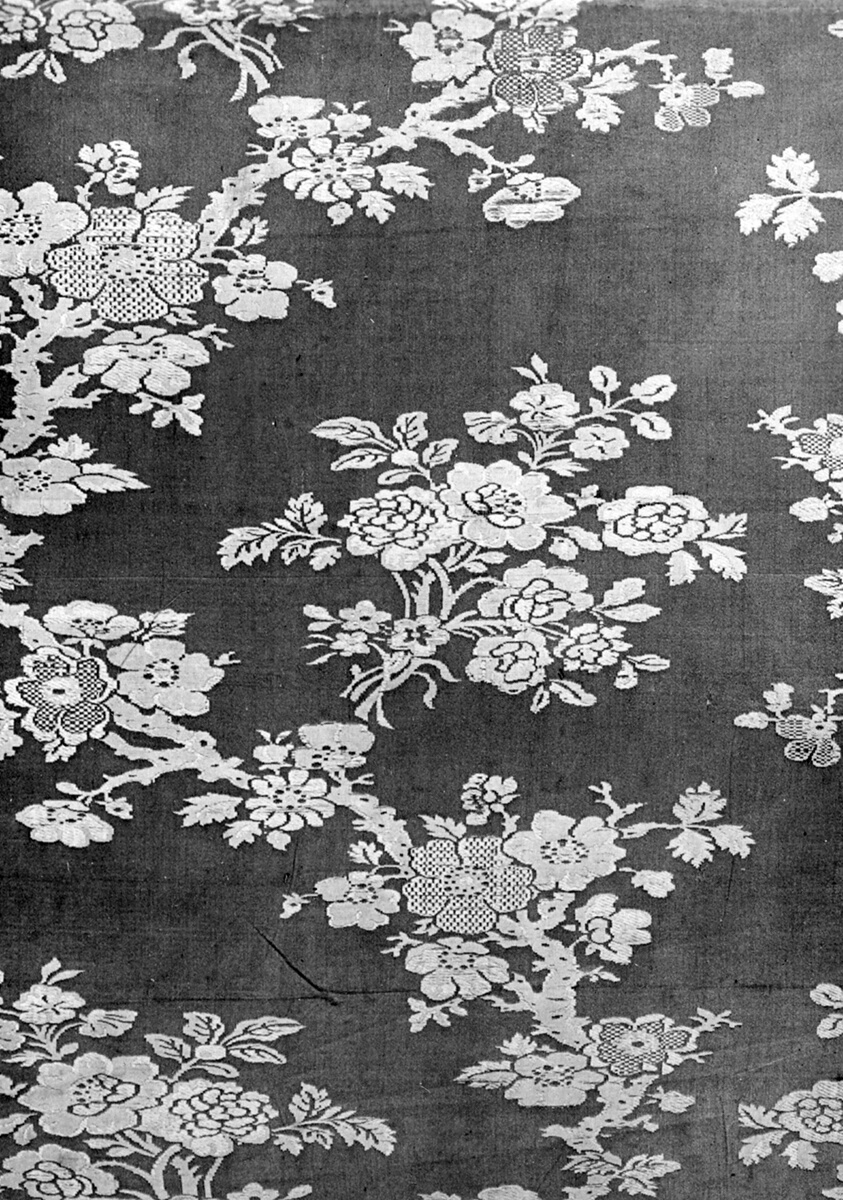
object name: Textile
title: Panel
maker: France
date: Mid–18th century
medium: Satin, fancy compound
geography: France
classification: textile; weaving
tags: flowers